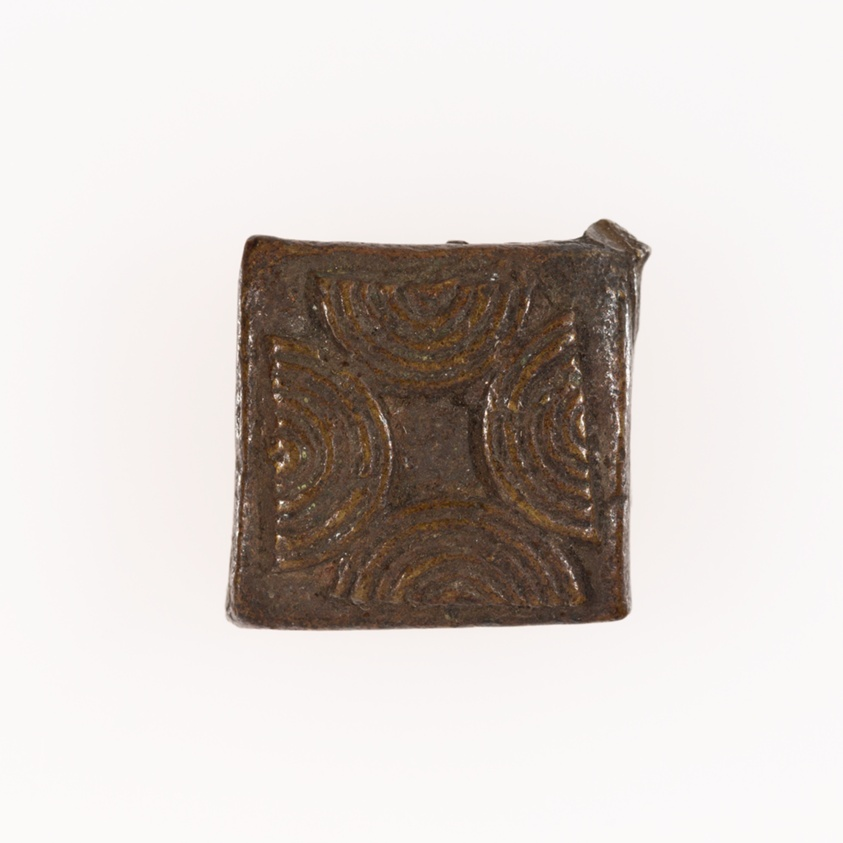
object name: Decorative Arts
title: Goldweight with a Geometric Design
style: asante, Arts of Africa, akan, african Art, Coastal West Africa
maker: Asante or related Akan-speaking peoples; Ghana; Coastal West Africa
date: 18th/19th century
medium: Copper alloy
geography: Ghana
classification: gold-weight; metal; arts of Africa; measure; african art; decorative arts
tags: geometric motif